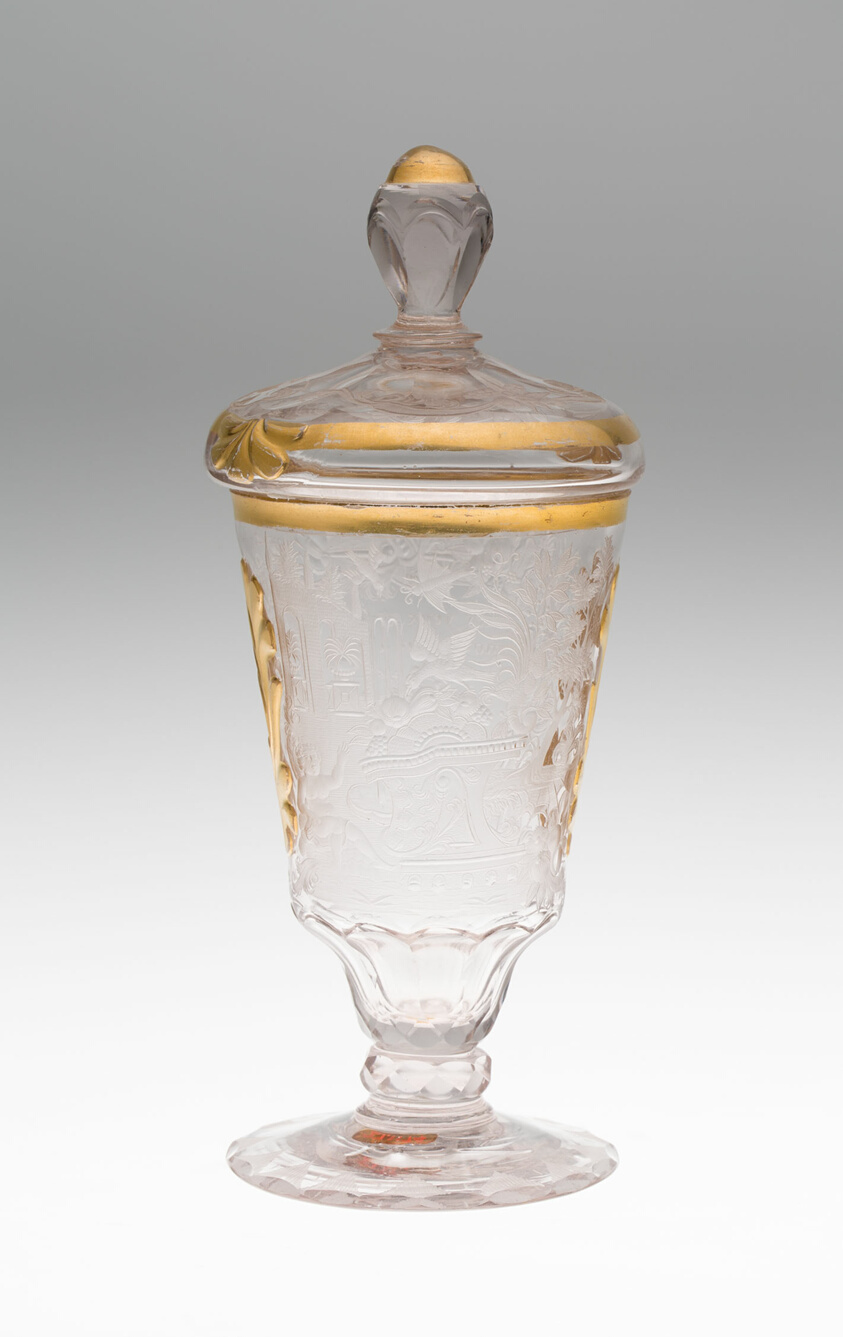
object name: Glass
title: Wine Glass and Cover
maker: Germany, Schleswig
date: c. 1740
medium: Glass; engraved and gilt decoration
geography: Schleswig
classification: drinking vessel; glass; european decorative arts